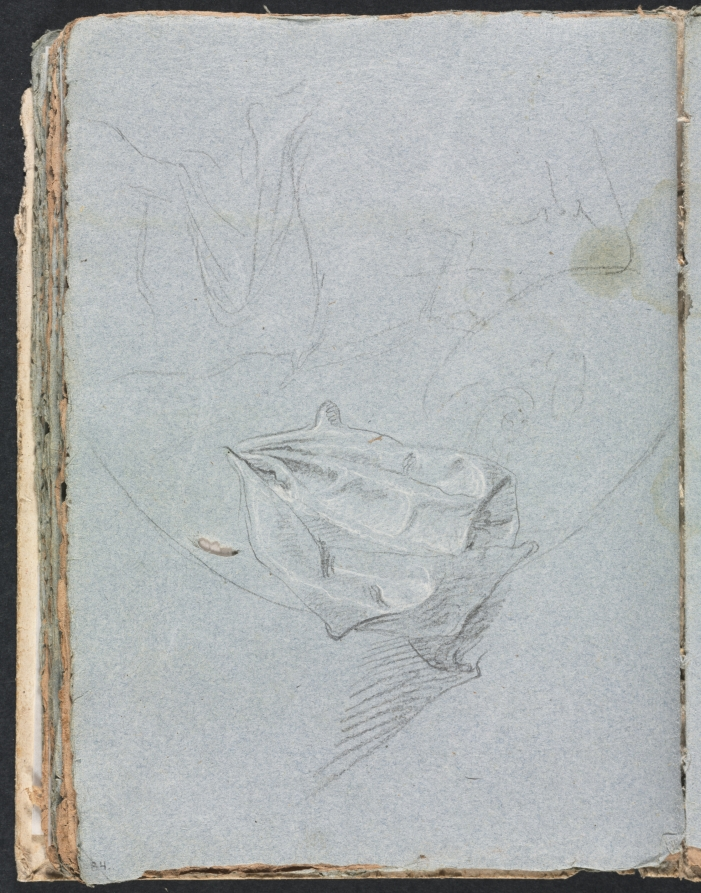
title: Verona Sketchbook: Drapery study (page 84)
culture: Italy, 18th century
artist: Francesco Lorenzi (Italian, 1723–1787)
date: 1760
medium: black chalk with white heightening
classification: Bound Volume